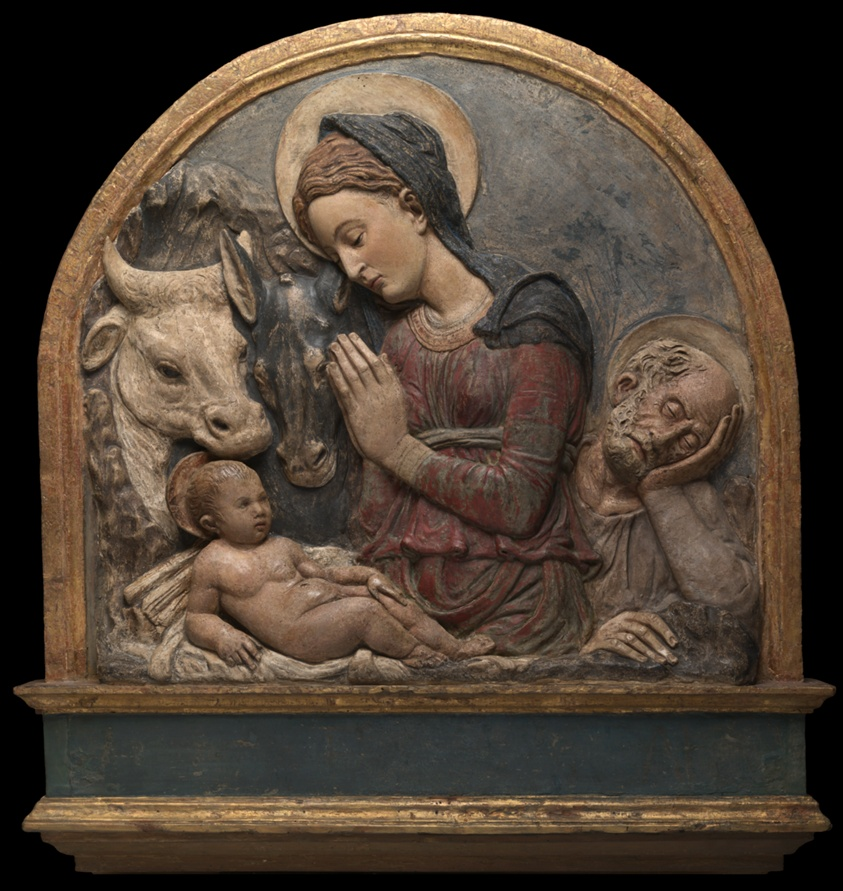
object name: Sculpture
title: The Nativity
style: 15th century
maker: Circle of Donatello (Italian, 1386/7–1466)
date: c. 1465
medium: Stucco and polychrome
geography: Italy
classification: relief; Italian; sculpture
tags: nativity scenes, woman, Virgin Mary, Virgin and child/Madonna and child, religious scenes, religious figures, religious, religion, red (color), mother and child, Jesus, horses, horse, holy family, fathers, family, families, Devotion, cows, Christianity, Christian subjects, children, blue (color), blue, babies